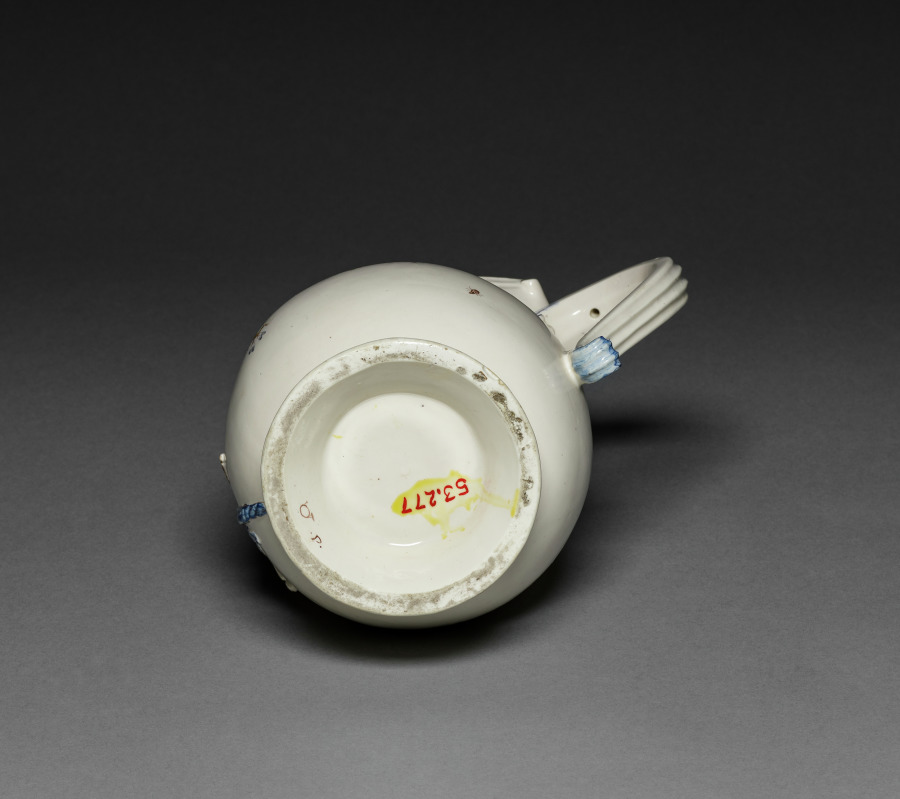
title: Ewer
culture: France, Chantilly, 18th century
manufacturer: Chantilly Porcelain Factory (French)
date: c. 1770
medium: soft-paste porcelain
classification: Ceramic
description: On the basis of the style of its decoration, particularly the symbolic trophies of love derived from the repertoire of classic ornament, this ewer and basin can be dated c. 1770. At this period, the output of the Chantilly factory was largely restricted to comparatively utilitarian table wares; pieces such as these are quite rare.